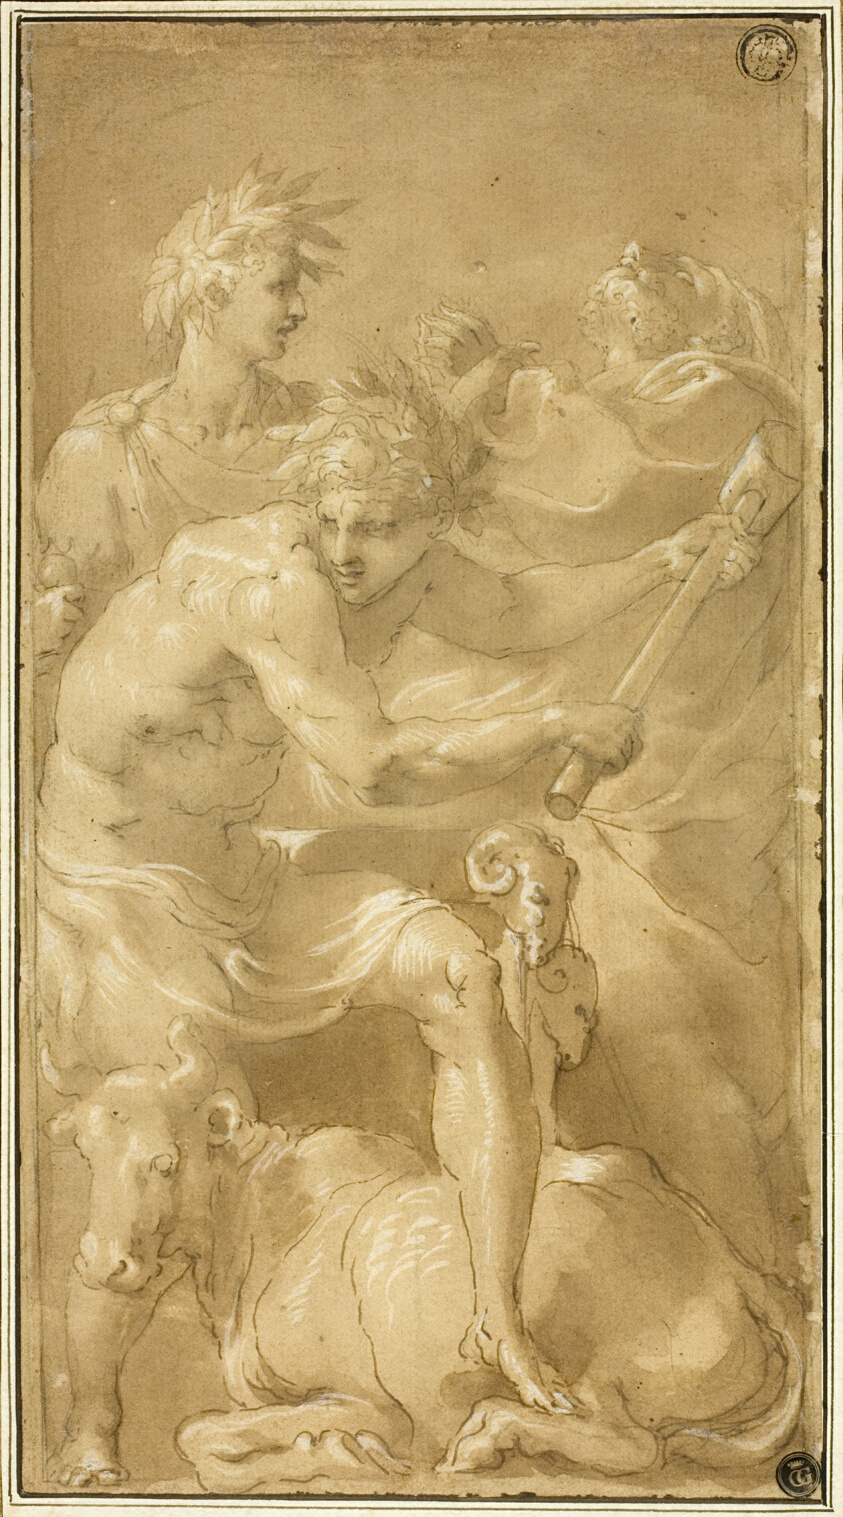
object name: Drawing and Watercolor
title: Sacrifice of a Bull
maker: Attributed to Francesco Primaticcio; Italian, 1504-1570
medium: Pen and brown ink with brush and brown wash, heightened with lead white, over traces of black chalk, on cream laid paper, laid down on ivory laid paper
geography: Italy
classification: ink and wash; drawings (visual works); prints and drawing